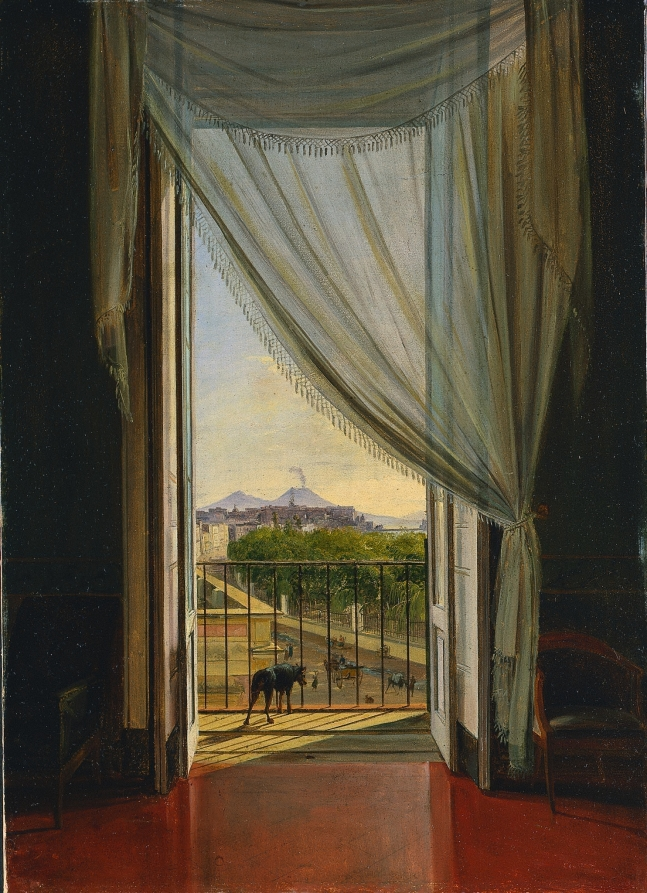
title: A View of Naples through a Window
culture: Germany, 19th century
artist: Franz Ludwig Catel (German, 1778–1856)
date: 1824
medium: oil on paper, mounted on canvas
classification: Painting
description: Franz Ludwig Catel worked in Rome and later traveled south to Naples. This painting presents that city’s most distinctive attraction: Mount Vesuvius, an active volcano that appears against an otherwise calm sky. Catel portrayed the scene from within a hotel room, contrasting the potentially overwhelming force of nature with the illusion of protection offered by distance and enclosed space.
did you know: Mount Vesuvius was almost continuously active at the time that Franz Ludwig Catel visited Naples, and erupted just two years before this painting was completed.